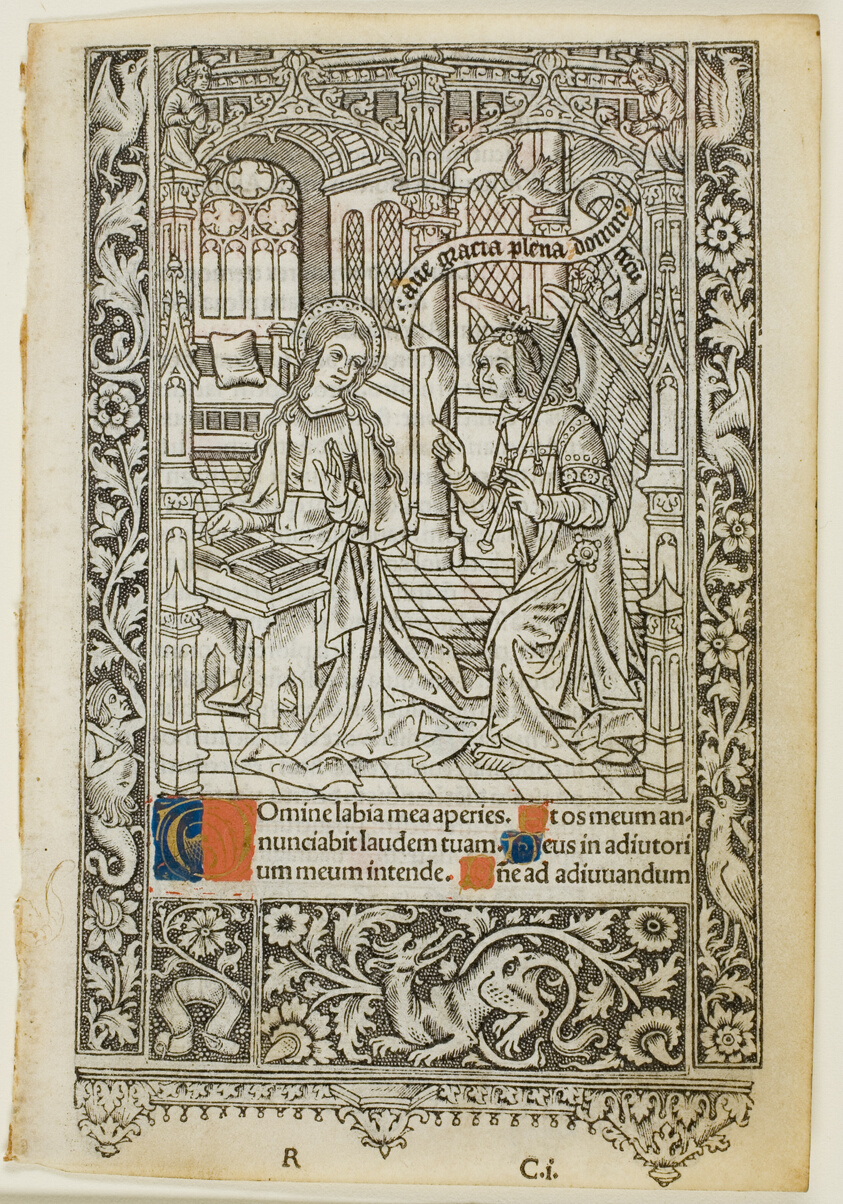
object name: Print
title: Annunciation, from a book of hours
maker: Thielmann Kerver (German, active 1497-1524)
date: 1505/10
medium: Metalcut and letterpress, with hand-coloring, on parchment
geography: Germany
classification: woodcut; print; prints and drawing